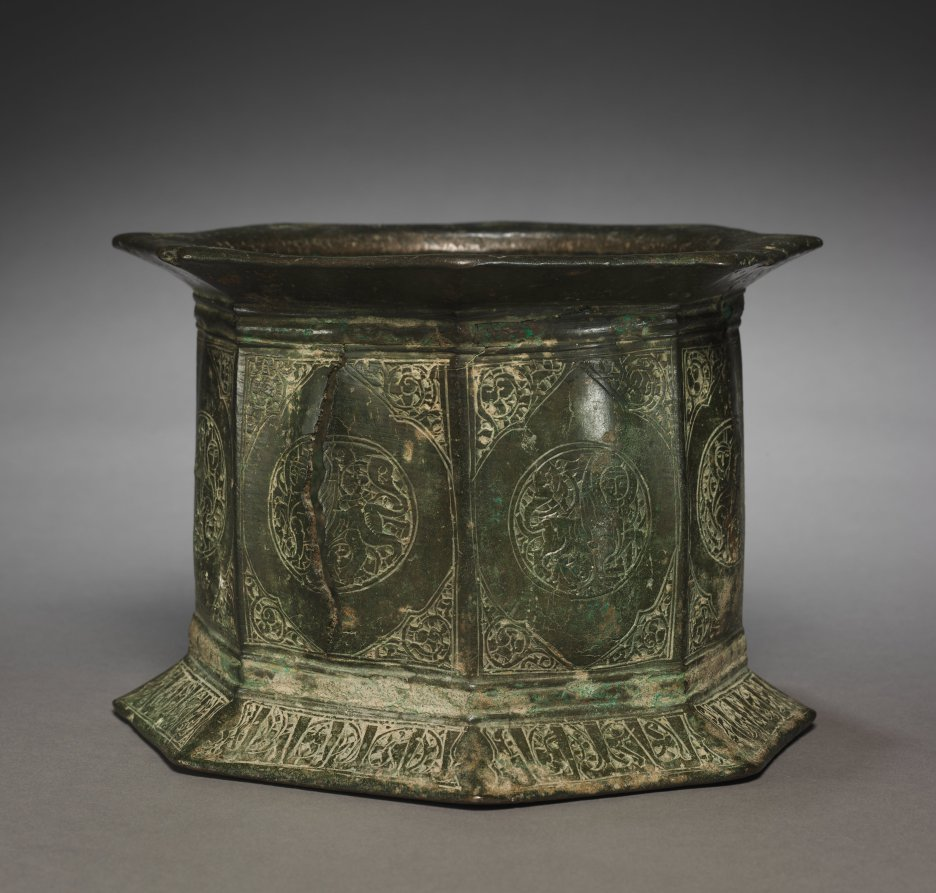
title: Mortar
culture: Iran, Seljuq period (1037–1194)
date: 1100s–1200s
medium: Cast bronze with incised decoration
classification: Metalwork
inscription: Thulth inscription on the Base, undeciphered